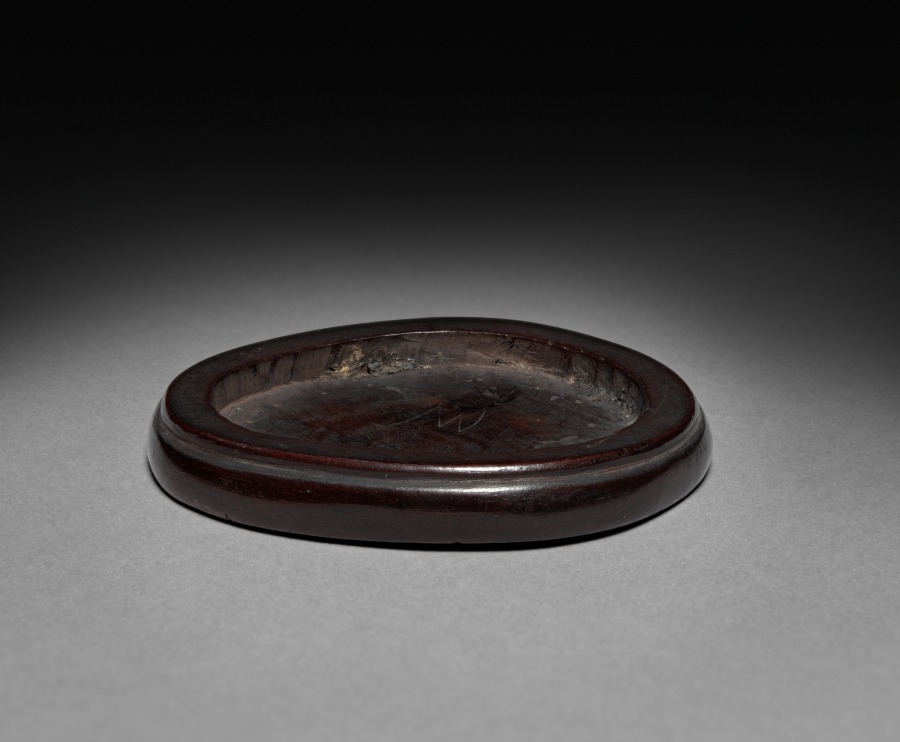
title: Base for Carved Tusk with Chinese Immortal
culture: Japan, Meiji period (1868–1912)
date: c. 1868–1912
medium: Wood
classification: Ivory